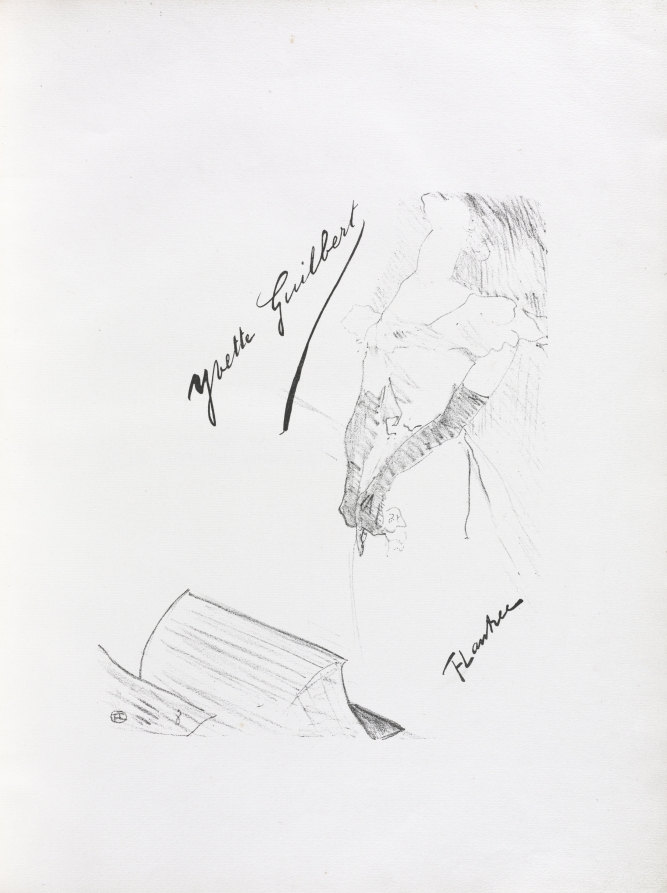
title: Yvette Guilbert-English Series: Frontispiece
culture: France, 19th century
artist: Henri de Toulouse-Lautrec (French, 1864–1901)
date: 1898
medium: lithograph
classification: Bound Volume